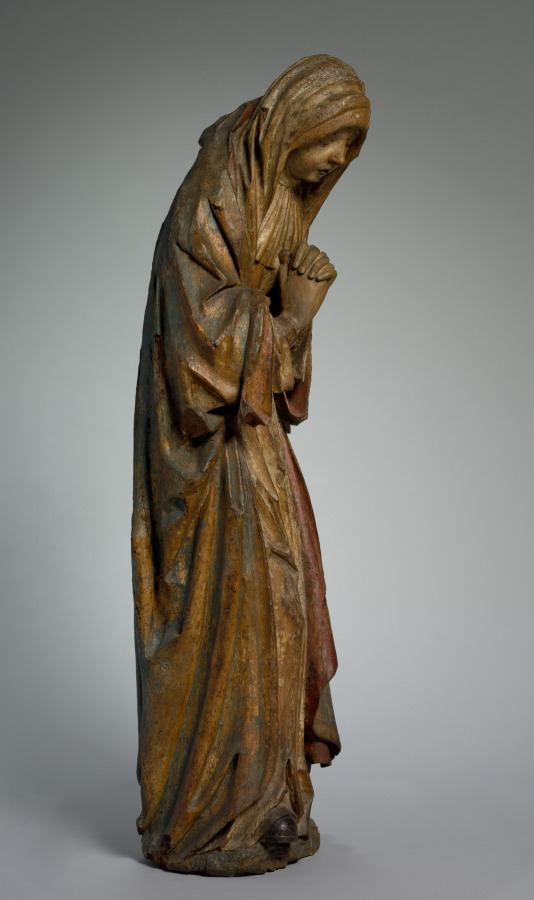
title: Virgin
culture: France, Champagne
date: 1510–15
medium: painted oak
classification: Sculpture